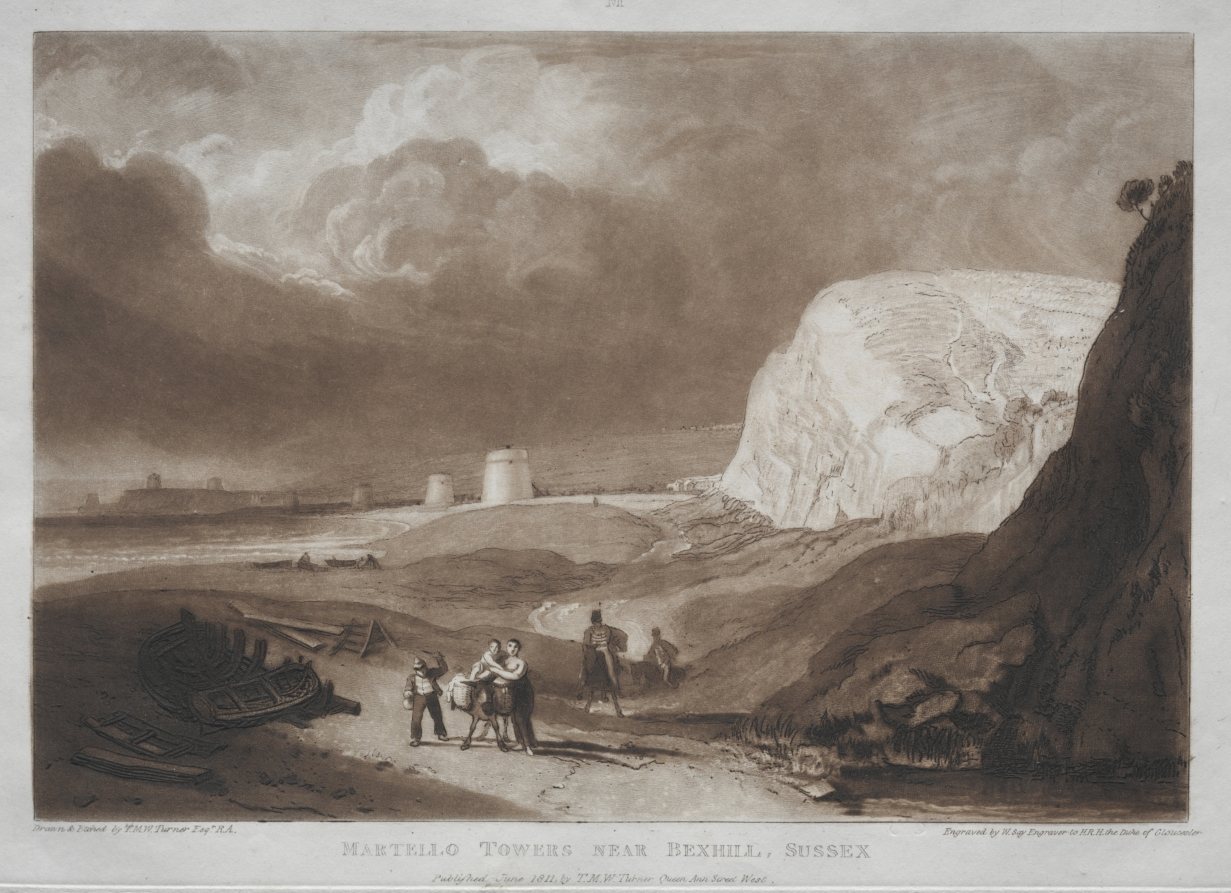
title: Liber Studiorum: Martello Towers, near Bexhill, Sussex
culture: England, 19th century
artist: Joseph Mallord William Turner (British, 1775–1851)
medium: etching and mezzotint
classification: Print